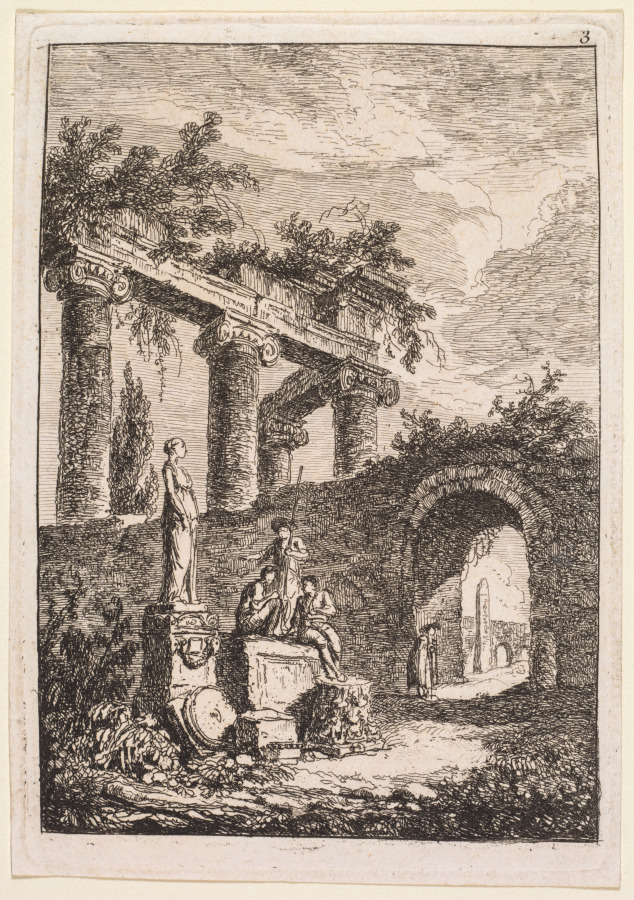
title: The Statue in Front of Ruins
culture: France, 18th century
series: Evenings in Rome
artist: Hubert Robert (French, 1733–1808)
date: 1763–64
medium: etching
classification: Print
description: Derived from his own pen-and-ink drawings, this suite of etchings features fictional characters situated near recognizable buildings and statues in Rome. On the title page, Robert dedicated the suite to Marguerite Le Compte, who visited Rome in 1764 in the company of the wealthy author and art enthusiast Claude Henri Watelet. Both Le Compte and Watelet were amateur etchers, and they socialized with a group that included artists and printmakers centered at the academies in Italy. Robert’s dedication was likely motivated by the hope of future patronage from Le Compte. She may be the generous woman with a hand muff depicted in The Ancient Temple, the fifth scene in this series.